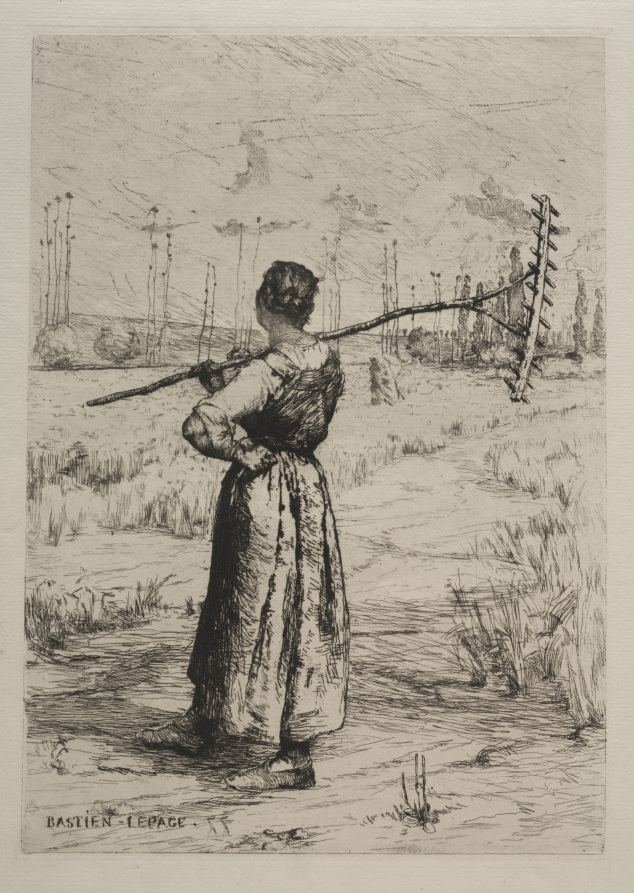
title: Retour des champs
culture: France, 19th century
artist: Jules Bastien-Lepage (French, 1848–1884)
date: 1878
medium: etching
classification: Print